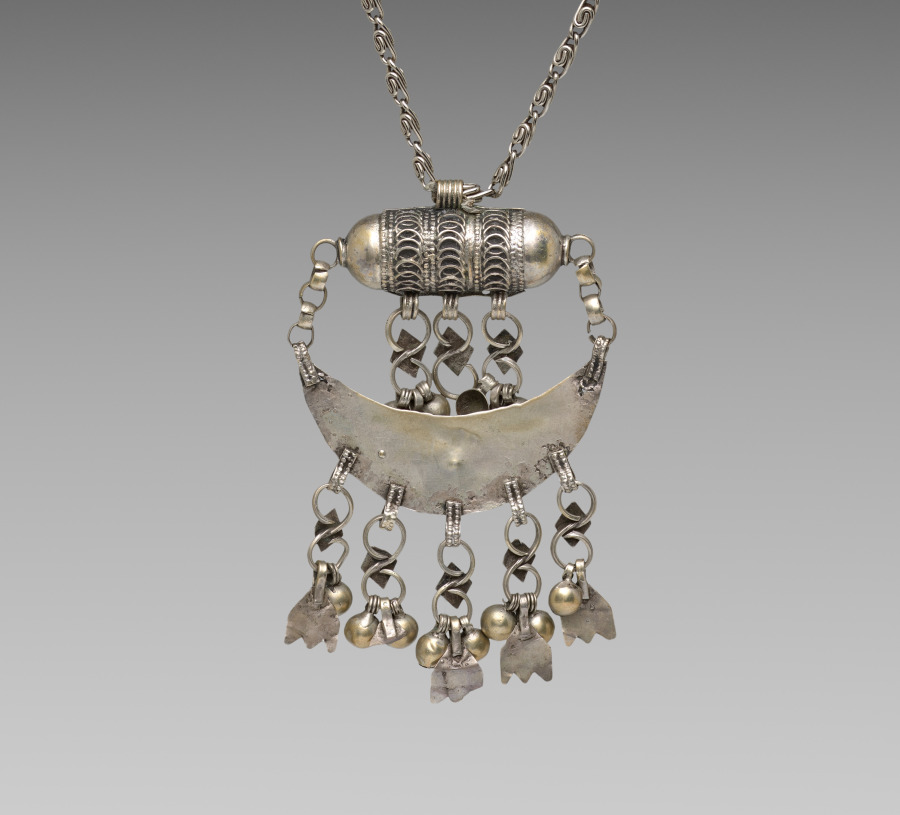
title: Necklace with pendant (waqari or wakari?)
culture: East Africa, probably Harar, Ethiopia, unknown silversmith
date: likely early to mid-1900s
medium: silver alloy, glass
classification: Jewelry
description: Ornate filigree jewelry was historically made in Ethiopia for royals and nobility by specialized silversmiths trained through long apprenticeships. This elaborate pendant necklace (waqari) probably made and worn in the Muslim city of Harar. Muslim women wore such massive jewelry, which holds aesthetic links to nearby Yemen. Its half-moon pendant is a protective crescent shape and its upper filigreed capsule is an amulet. The crescent symbol has existed as a talismanic form in Ethiopia since the Aksumite Empire (1–700s CE).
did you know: Silversmiths also made objects for religious and royal use, like crowns and crosses.